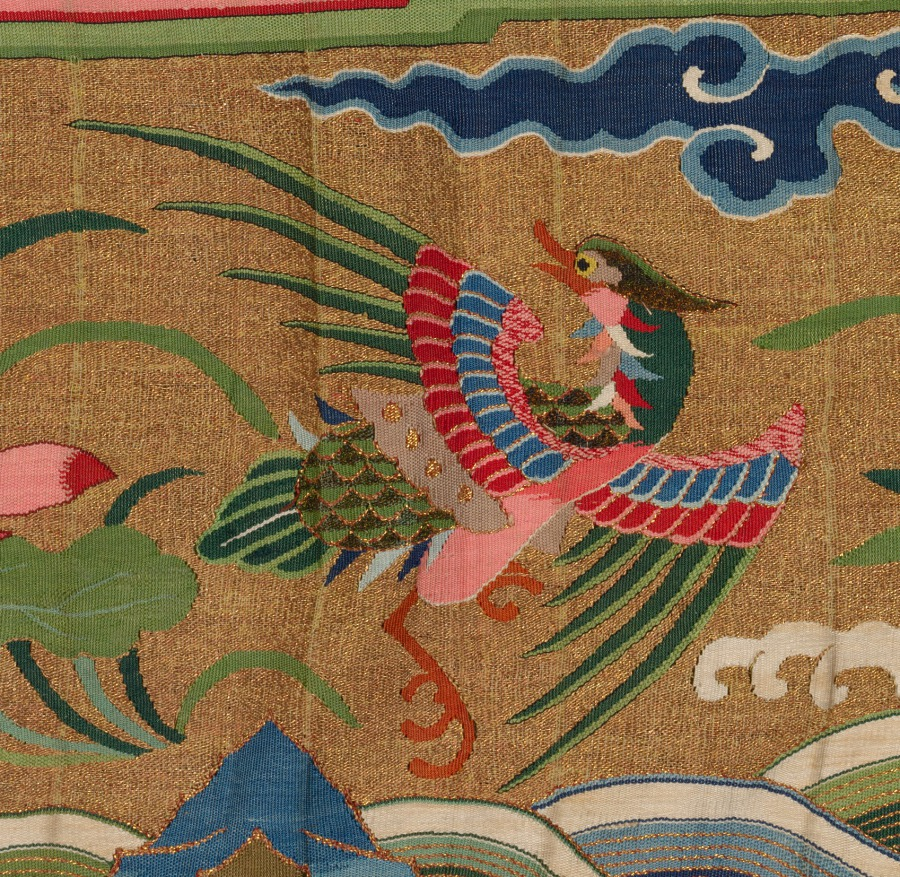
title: Strip of Silk Tapestry (Kesi)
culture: China, Qing dynasty (1644–1911)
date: 1700s–1800s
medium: Silk and gold thread; tapestry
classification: Tapestry